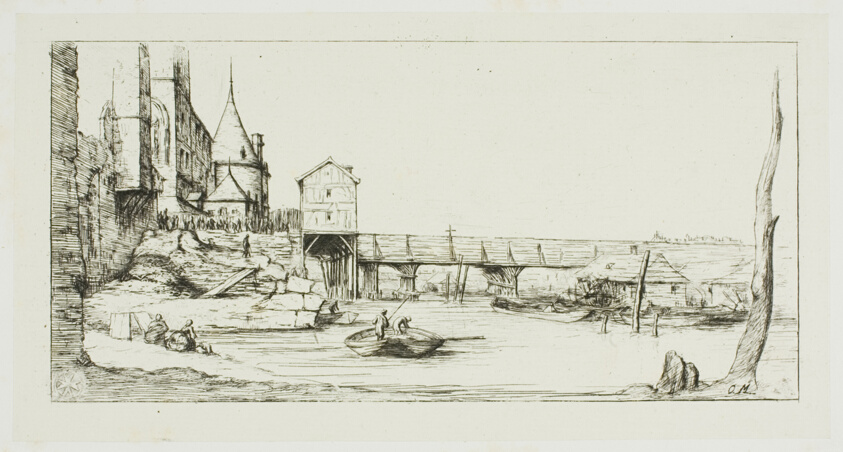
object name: Print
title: The Footbridge Temporarily Replacing the Pont-au-Change, Paris, After the Fire of 1621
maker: Charles Meryon (French, 1821-1868); after Stefano della Bella (Italian, 1610-1664)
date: 1860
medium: Etching on ivory laid paper, laid down on ivory wove paper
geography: France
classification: etching; print; prints and drawing